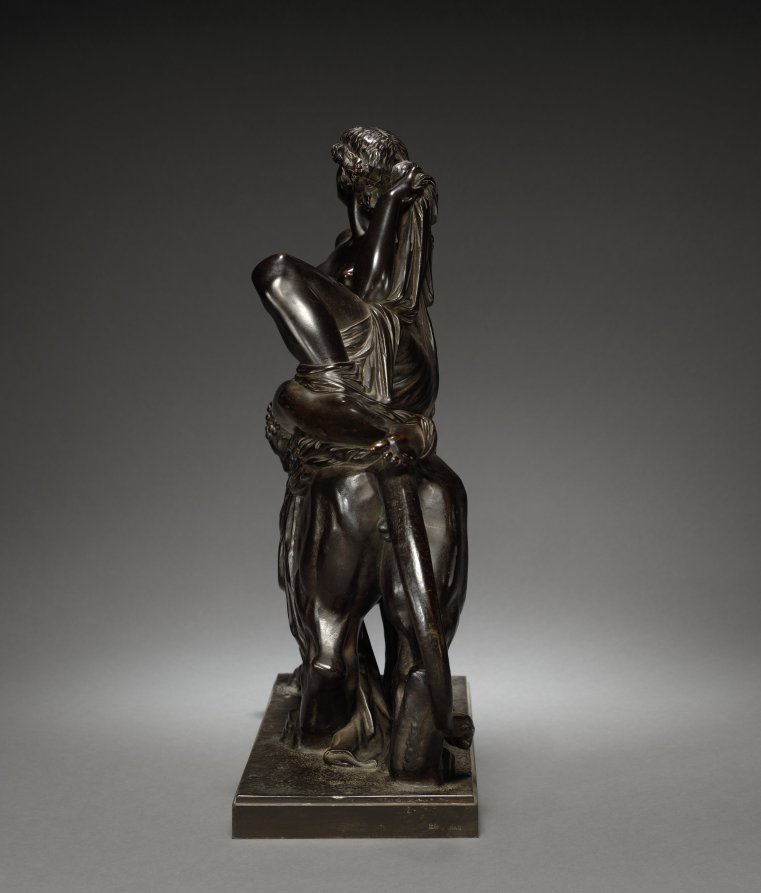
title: Ariadne on a Panther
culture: France, 19th century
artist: Jean-Baptiste Clésinger (French, 1814–1883)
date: 1873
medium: bronze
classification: Sculpture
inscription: signed on side of base: "J. CLESINGER"; inscribed around edge of stamp: "BRONZE ARTISTIQUE/DE PARIS"; on cut of neck of woman, "CAYUZ"; on edge of base: "1 Rue de la PAIX."